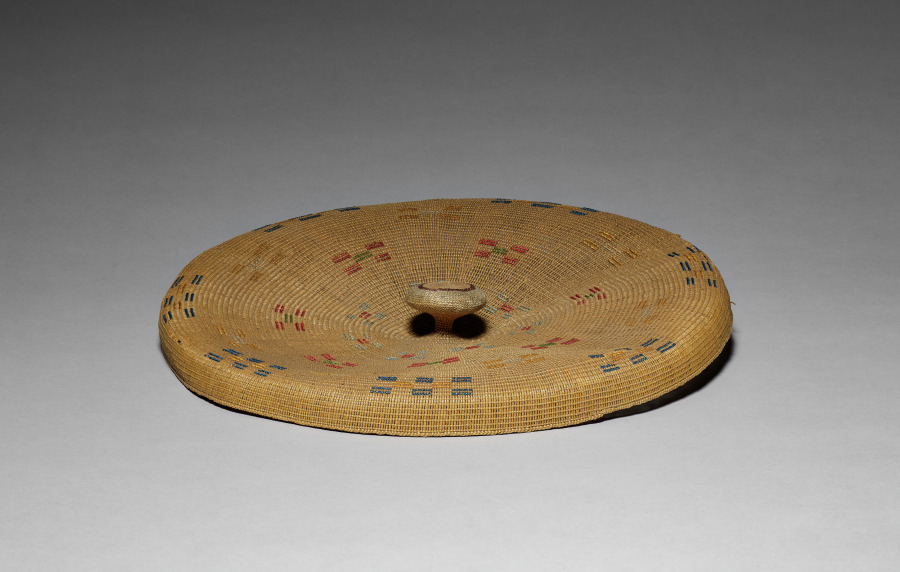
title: Cover for a Twined Cylindrical Basket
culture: Arctic, Aleut (Attu), late 19th-early 20th century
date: late 1800s–early 1900s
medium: twined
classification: Basketry